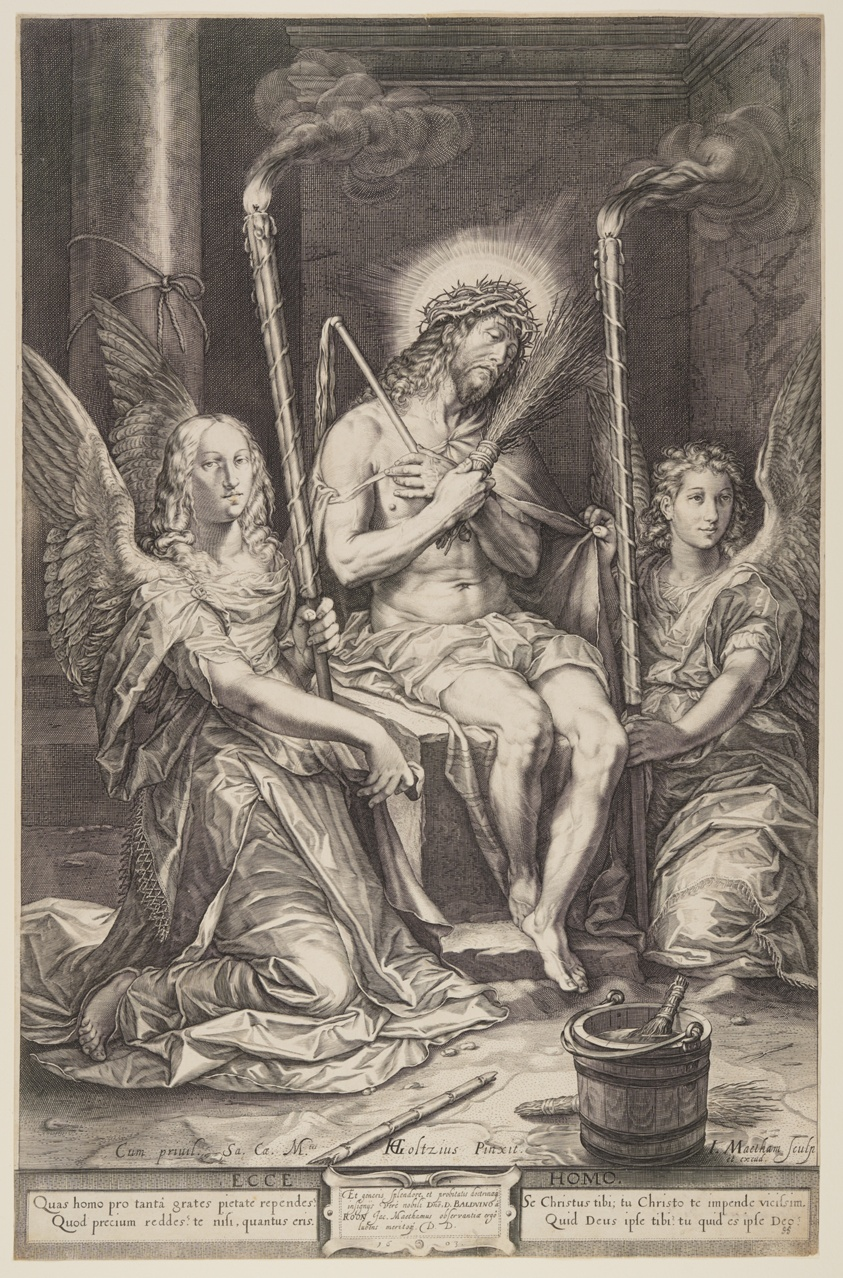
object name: Print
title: Christ on the Cold Stone with Two Angels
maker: Jacob Matham (Dutch, 1571–1631); after Hendrick Goltzius (Dutch, 1558–1617)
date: 1603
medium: Engraving on ivory laid paper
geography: Netherlands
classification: engraving; paper; print; prints and drawing